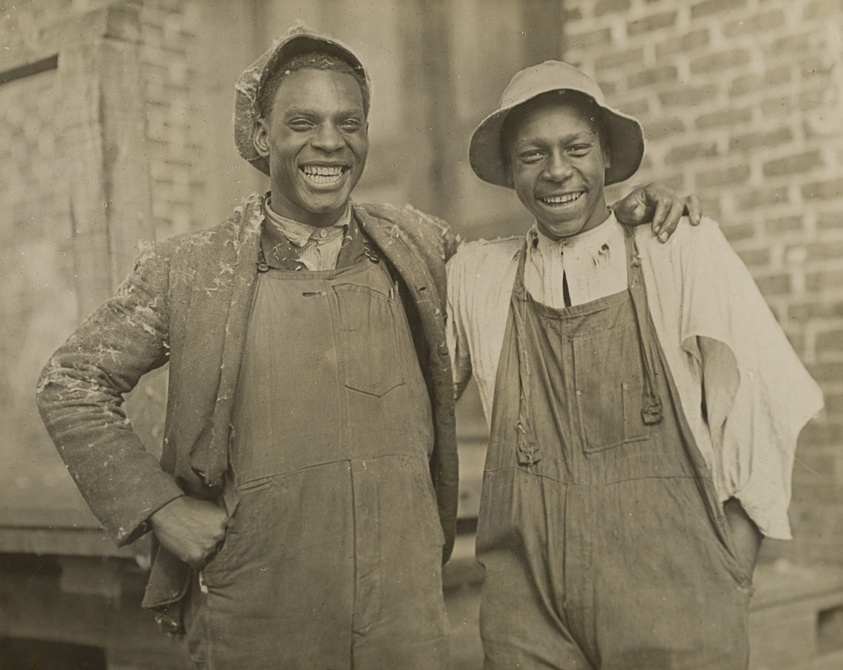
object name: Photograph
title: Cotton Mill Workers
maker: Lewis Wickes Hine (American, 1874–1940)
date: 1905/10, possibly printed c. 1930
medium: Gelatin silver print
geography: United States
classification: photograph; photography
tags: documentary